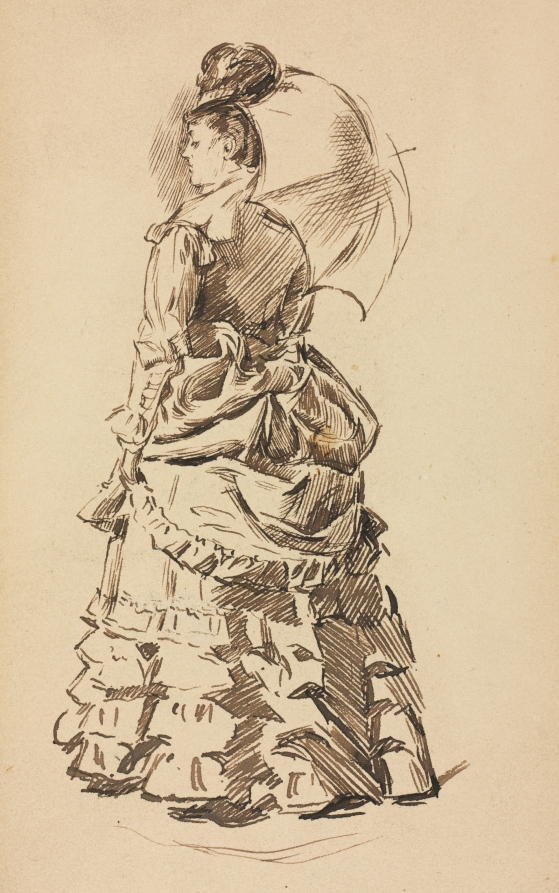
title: Study for "Mind and Matter"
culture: England, 19th century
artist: Charles Samuel Keene (British, 1823–1891)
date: c.1867–91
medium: pen and ink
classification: Drawing